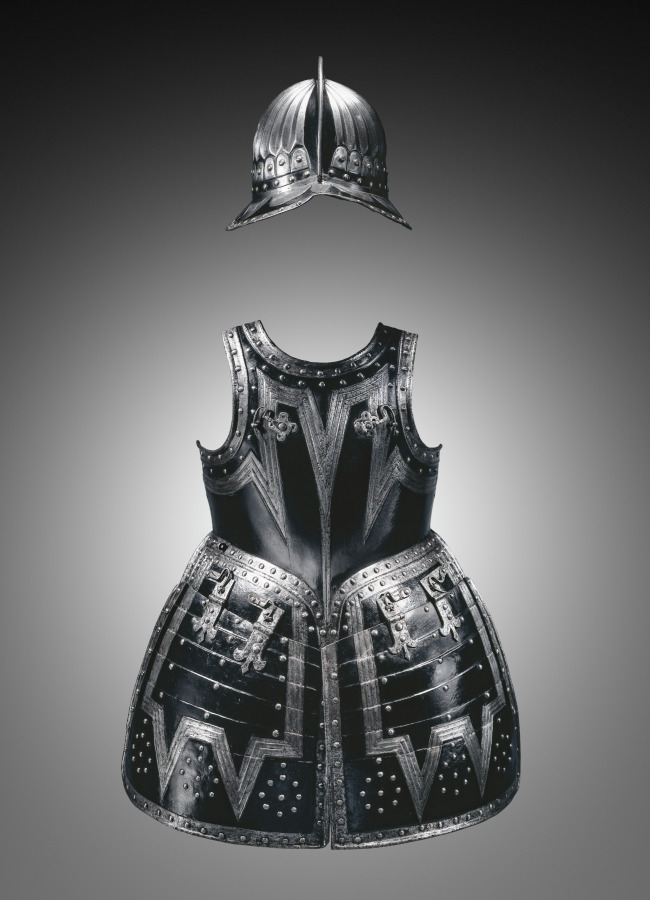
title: Pikeman’s Armor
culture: Netherlands, Dutch or Flemish, 17th century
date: c. 1620–30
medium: steel with brass rivets and black paint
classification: Arms and Armor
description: Pikemen formed the backbone of infantry tactics through the end of the English Civil Wars (1642–51). Since muskets alone were ineffective against cavalry charges, companies of pikemen, armed with pikes, or spears, of 12 to 16 feet in length, were deployed in defensive formations to protect the musketeers, who wore no armor. A pikeman was usually equipped with a breastplate and backplate, hinged tassets reaching to mid-thigh, and sometimes a gorget, or neck piece, worn over a heavy buffcoat. High boots replaced leg armor. A brimmed, high-combed helmet known as a "pot" protected the head. Pikeman's armor withstood hard service. It was colored and treated (though the black paint seen here is modern) to control rusting and to add decorative interest.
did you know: With its chevron decoration, this armor is slightly more decorative than most pikeman, suggesting that an officer could have owned it.